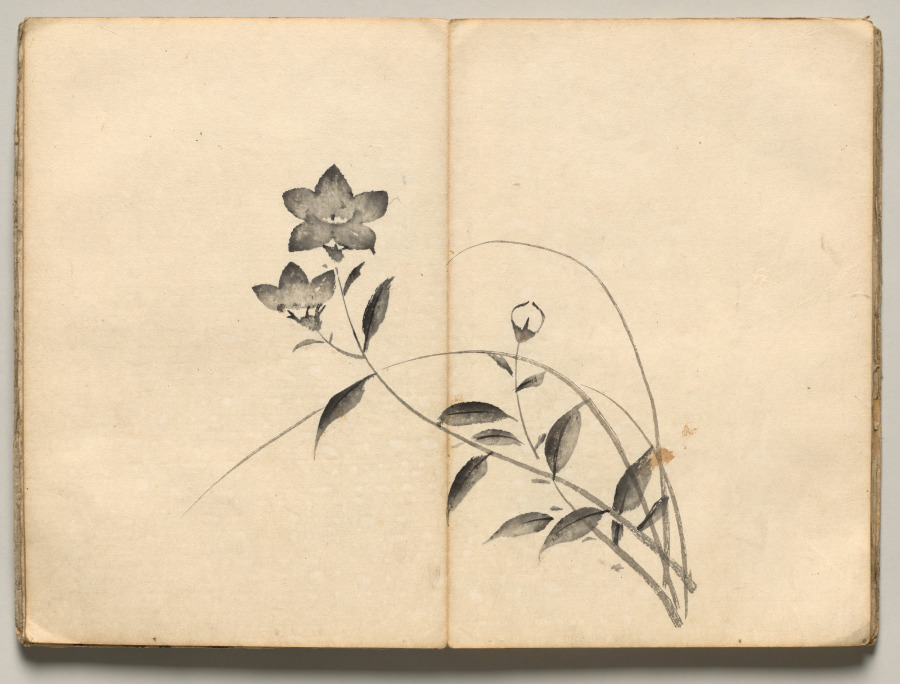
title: Chinese Bellflower from Ōkyo Picture Book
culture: Japan, Edo period (1615–1868)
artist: after Maruyama Ōkyo (Japanese, 1733–1795)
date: 1850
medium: accordion-style woodblock printed folding-book; ink and color on paper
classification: Bound Volume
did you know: This impression of a book of woodblock-printed designs is missing a spread that depicts a crane.